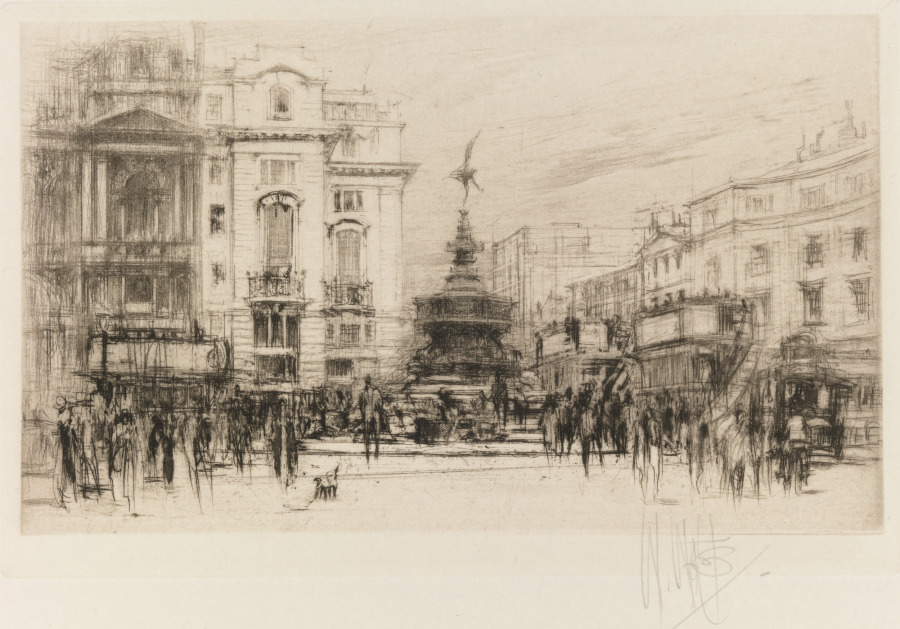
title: London Set: Piccadilly Circus (with Criterion Theatre)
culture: Britain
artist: William Walcot (British, 1874–1943)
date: 1924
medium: etching on wove paper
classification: Print